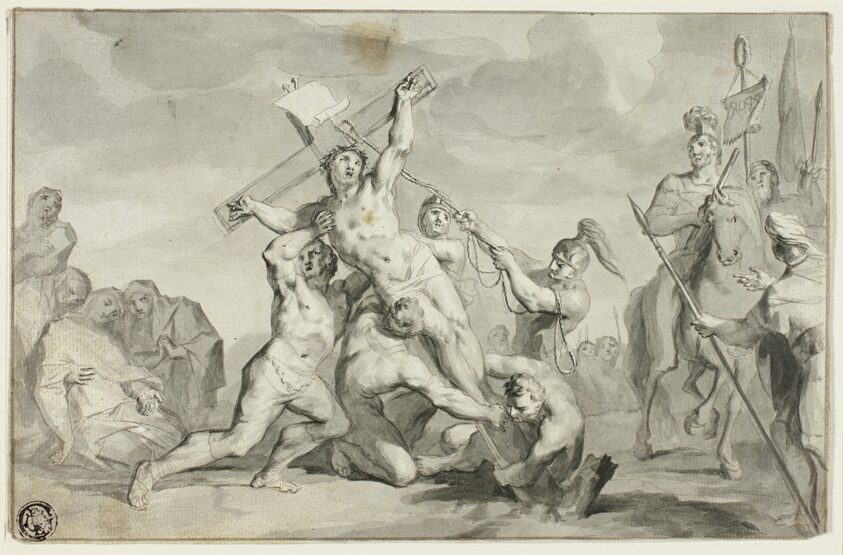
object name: Drawing and Watercolor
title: The Raising of the Cross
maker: Ottmar Elliger, the younger (German, 1666-1735)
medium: Pen and gray and brown ink, with brush and gray wash, over traces of red chalk, on ivory laid paper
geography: Germany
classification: ink or chalk wash; drawings (visual works); prints and drawing